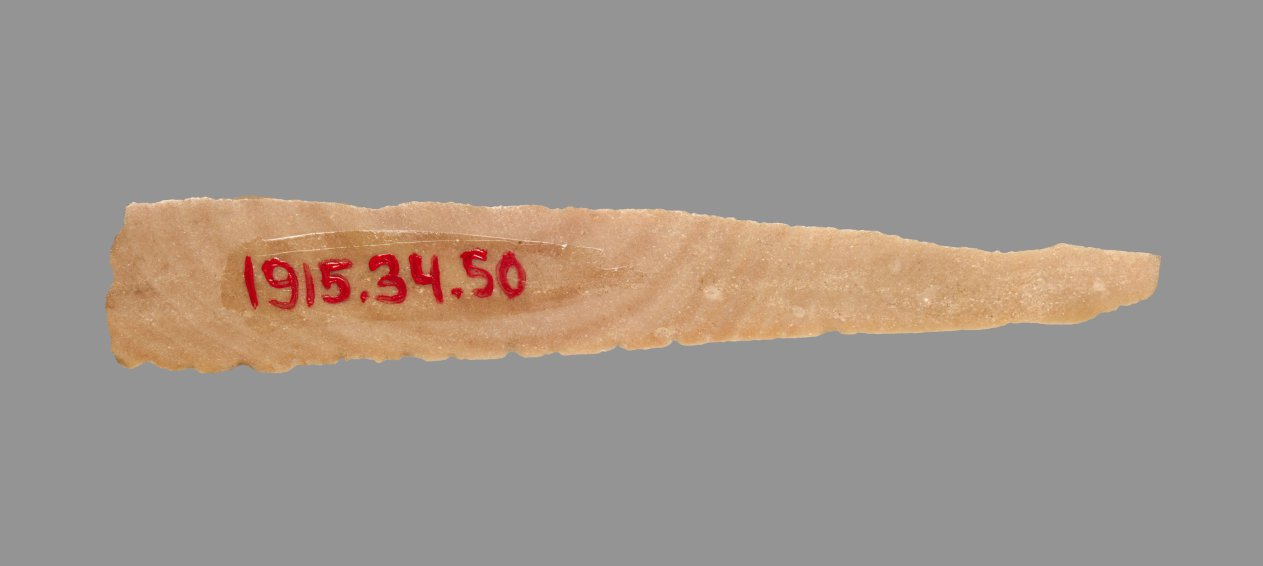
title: Sickle Blade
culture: Egypt, Middle Kingdom (2040–1648 BCE), Dynasty 12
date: 1980–1801 BCE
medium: flint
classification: Implements